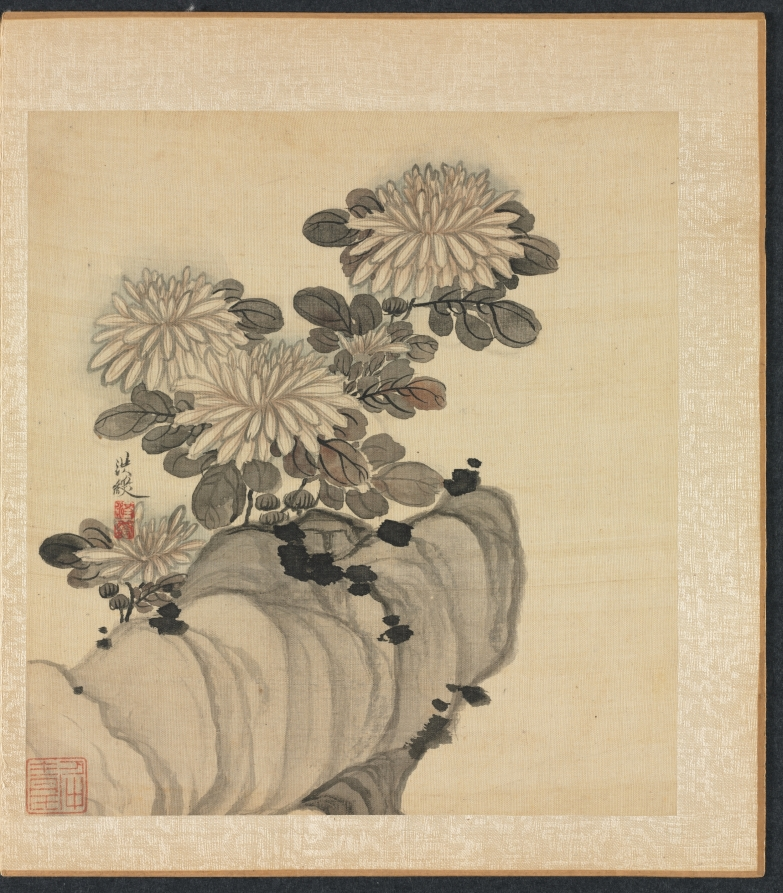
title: Paintings after Ancient Masters: Chrysanthemum and Rock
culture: China, Ming dynasty (1368–1644)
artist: Chen Hongshou (Chinese, 1598/99–1652)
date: 1598–1652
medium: album leaf, ink and color on silk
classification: Painting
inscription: Hung-shou [seal] Hung-shou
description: The twenty paintings in this double album by Chen Hongshou include landscapes, figures, and flowers. It also has one leaf featuring a woman, an often-used subject not found in the other albums from the latter part of his career. His late works are wonderful summations of Chen's peculiar and quirky art—archaistic, hyper-refined–but without accompanying shallowness or sentimentality. His figures and landscapes in the late albums are miniaturized, not unlike the small Chinese gardens, or the carefully selected small table rocks or old roots used for contemplation to see the world in miniature. This loss of scale is quite deliberate and reflects the psychological situation of a depressed class like the Ming loyalist officials and scholars, deprived of their integrity and honor, and forced to lead a diminished and restricted existence.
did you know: Chrysanthemums evoke the poet Tao Yuanming (365–427 CE) who turned down a government career during a fraught political era.